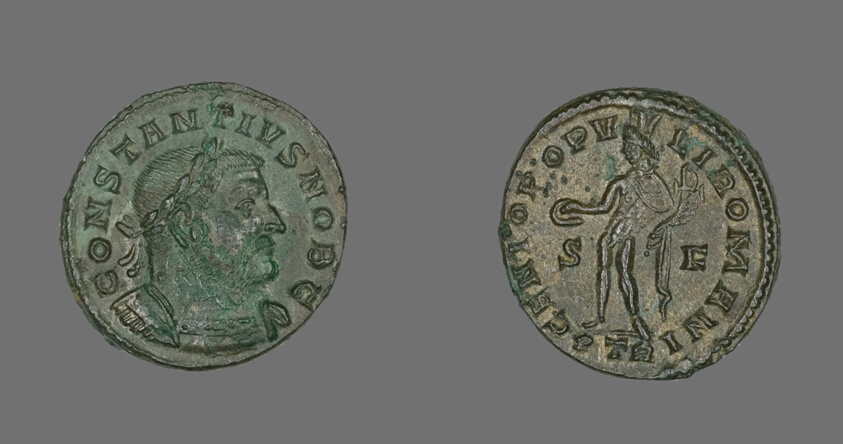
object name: Coin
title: Coin Portraying Emperor Constantius I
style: roman (ancient, style or period)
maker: Roman, minted in Trier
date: 303-305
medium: Bronze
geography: Trier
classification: coin; ancient art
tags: portrait